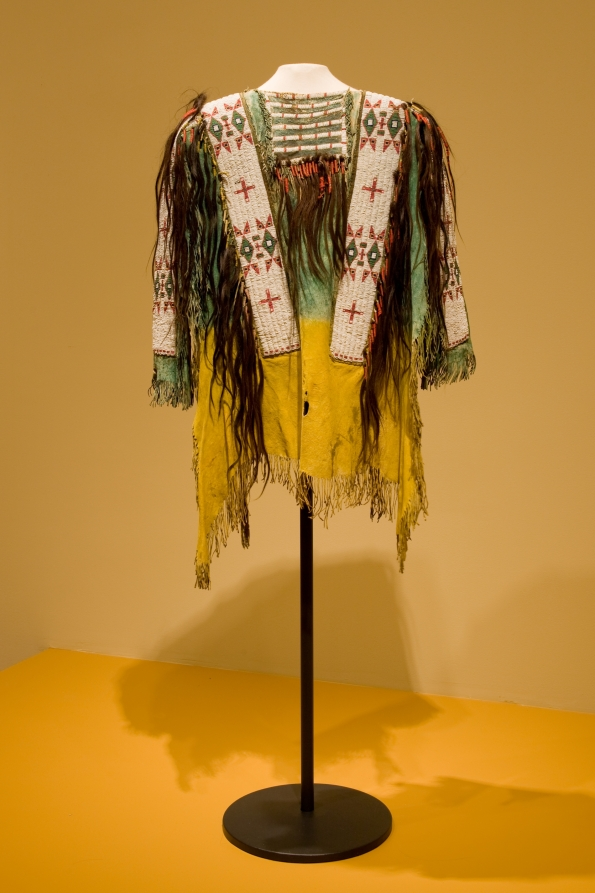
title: Hide Shirt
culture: America, Native North American, Central Plains, Lakota Sioux, 19th century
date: c. 1890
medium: hide, pigment, glass beads, human hair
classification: Textile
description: Traditionally, only Lakota (Sioux) head chiefs had the right to wear painted shirts, an honor they earned through sacrifice and bravery but lost by failing in their responsibilities. By the time this example was created, European Americans had confined the Lakota to reservations, and painted shirts had become the privilege of battle veterans rather than of active warriors. Family members probably donated the locks of hair, each representing a war exploit.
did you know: Only Lakota (Sioux) chiefs had the right to wear painted shirts, an honor they earned through bravery.